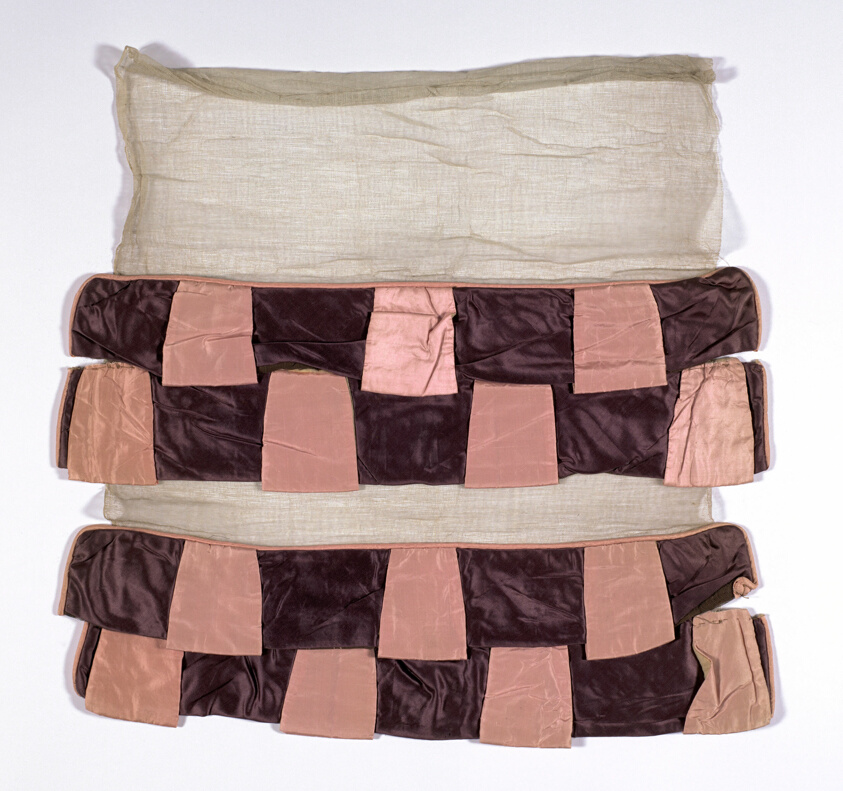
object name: Textile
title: Sample (Dress Trimming)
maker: England or France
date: 1815/35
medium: Silk, plain weaves and silk, satin weaves; pieced; lined with cotton, plain weave, sized; padded with cotton batting; mounted to cotton, plain weave, sized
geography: France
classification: textile; needlework - costume; weaving